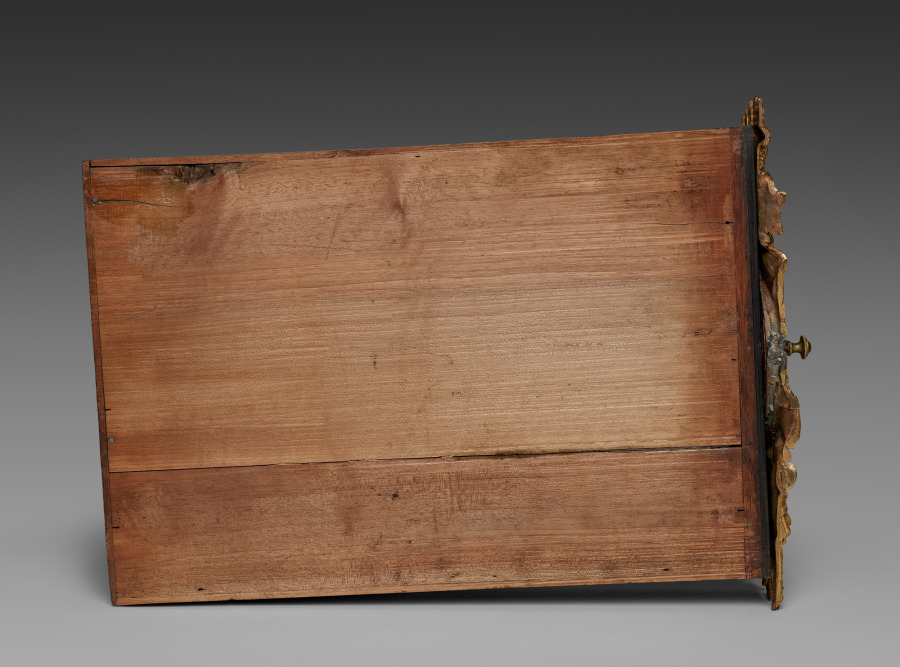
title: Center Drawer for Cabinet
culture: France, late 17th Century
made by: André-Charles Boulle (French, 1642–1732)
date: c. 1690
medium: ebony, marquetry in metal and tortoiseshell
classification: Furniture and woodwork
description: Appointed cabinetmaker to King Louis XIV in 1672, André-Charles Boulle became a master of furniture making in France during the late 1600s until his death in 1732. Known primarily for his use of marquetry, in which metal patterns are inlaid into tortoiseshell then applied within the veneered surface of the furniture, Boulle established a level of quality and craftsmanship few others could achieve. As a result, his work found favor at the royal court and among other aristocrats and diplomats eager to impress the king. The inclusion of a medallion depicting Louis XIV within the bronze decoration of this chest would have identified the owner with the royal court. Often exhibiting stout architectural proportions with elegant groups of inlaid motifs such as the parrot on the central panel of this chest, Boulle’s designs are an example of the intellectual fashion for contrasting ideas, materials, and motifs.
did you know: Originally designed to sit atop an elaborate tall stand, this chest was likely altered in the late 1700s to reduce its scale and height.